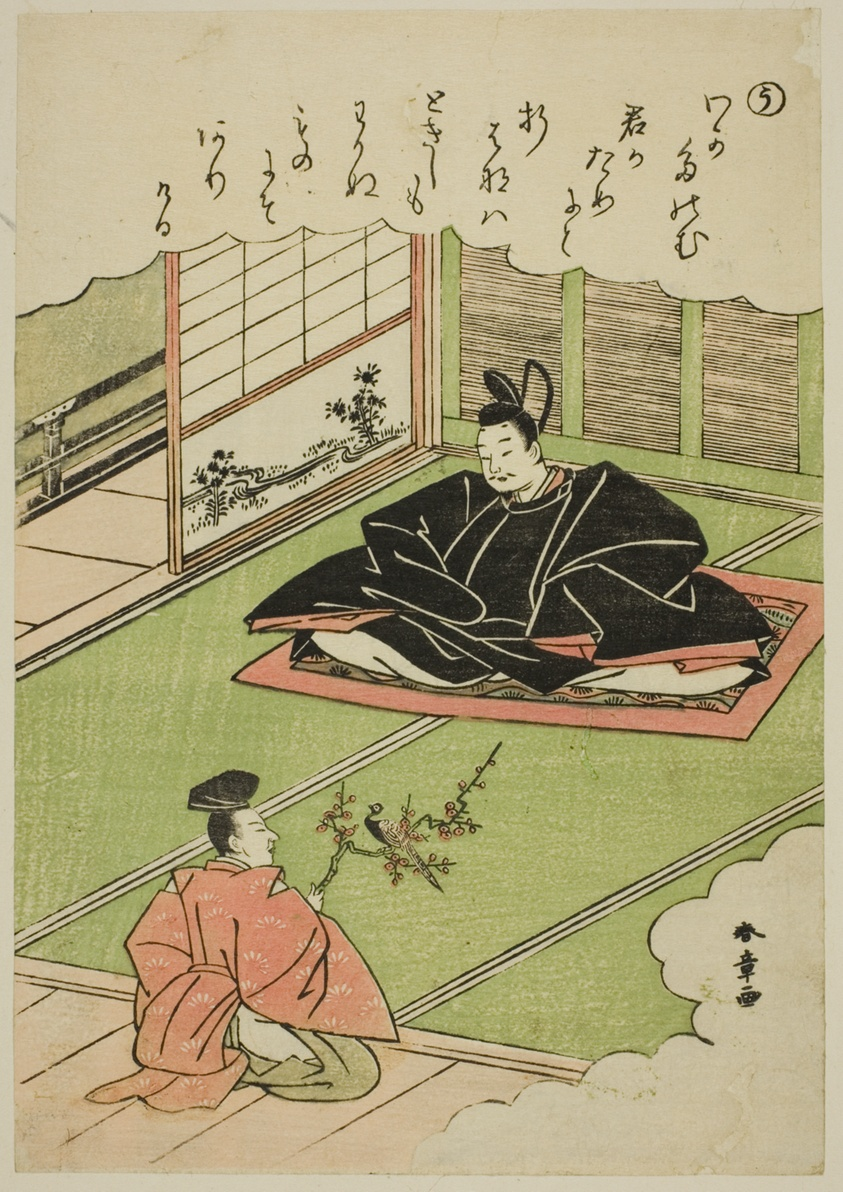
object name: Print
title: "U": Narihira Presents a Chancellor with a Model of a Pheasant, from the series "Tales of Ise in Fashionable Brocade Pictures (Furyu nishiki-e Ise monogatari)"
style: Japanese (culture or style)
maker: Katsukawa Shunsho 勝川 春章; Japanese, 1726-1792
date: c. 1772/73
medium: Color woodblock print; koban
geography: Japan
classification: woodblock print; print; asian art